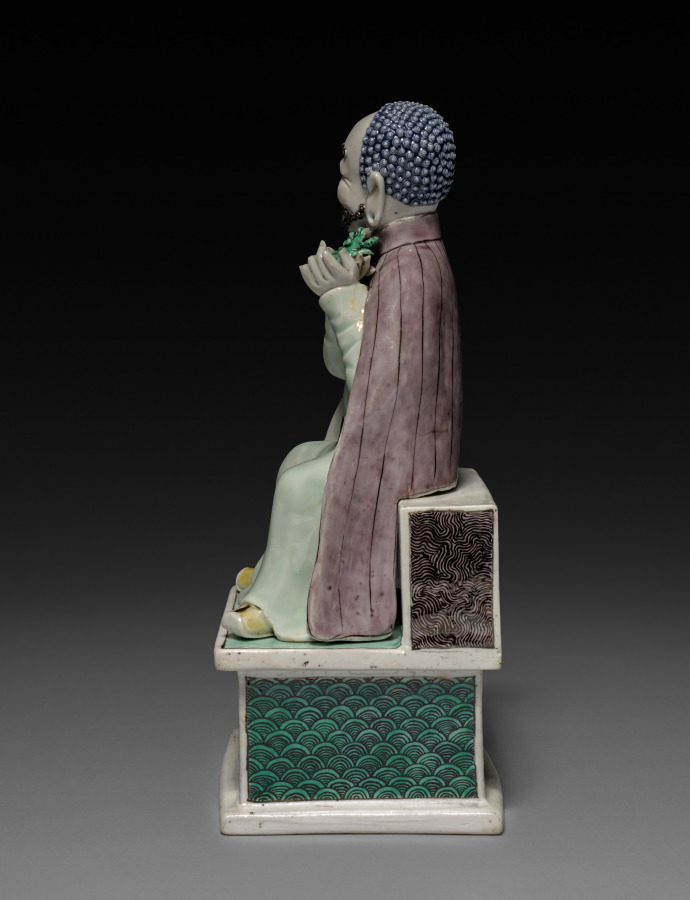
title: Lohan (Arhat) Holding a Fu Dog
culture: China, Jiangxi province, Jingdezhen kilns, Qing dynasty (1644-1911), Kangxi reign (1662-1722)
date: 1662–1722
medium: porcelain with famille verte overglaze enamel decoration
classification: Ceramic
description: Lohan are disciples of Buddha with supernatural powers and eccentric behaviors. This lohan is holding the fu-dog, symbolizing good luck, while its mate is holding the peach of longevity (shoutao). With carefree smiles and playful gestures, these two figures embody a humorous attitude and a detachment from worldly affairs. This pair of porcelain figures was perhaps part of a house altar set or a decorative item in a household.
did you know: This lohan and its pair embody a humorous attitude and playful behavior, indifference to danger and miracles, and hence a detachment from worldly affairs.